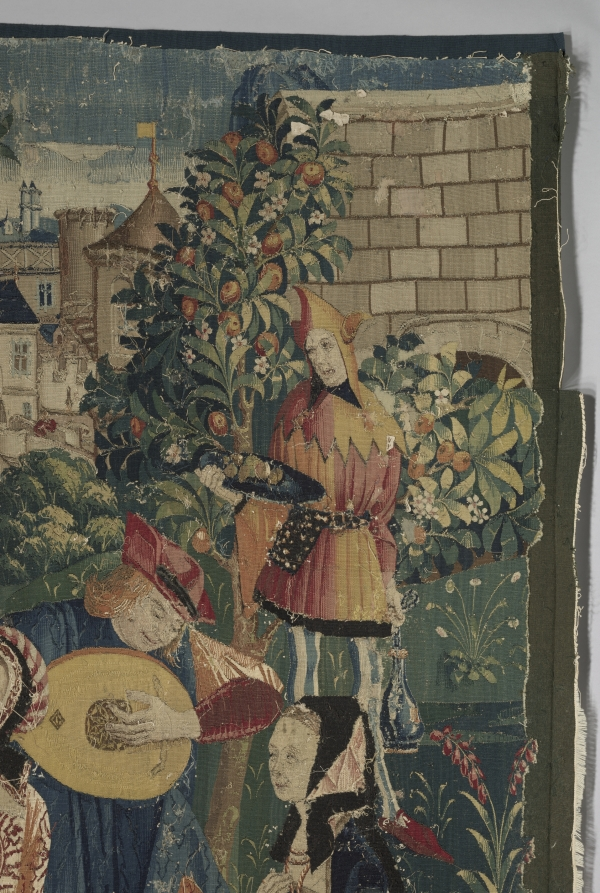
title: Time (from Chateau de Chaumont set)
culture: France, Lyon(?), early 16th century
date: 1512–15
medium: silk and wool; tapestry weave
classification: Tapestry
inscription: French verse in Gothic letters translates as follows: "One sees the weather adorned in green, Sometimes as pleasing as an angel; To suddenly change and be quite strange, The weather never stays the same."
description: Pierre Sala, who likely commissioned the set, is portrayed as the richly attired central figure offering a bouquet, a symbol of knowledge, to Éléonore, his daughter. Éléonore is pregnant, revealed by her upturned skirt and the persimmon in her husband Hector’s hand. Hector’s mother, Marguerite, in dark attire, will wed the widowed Sala in 1519. They appear in front of the royal chateau of Blois. The figures at the right convey Sala’s advice to his children. Time (the old man with the staff) with Clio, the Muse of History, standing on his shoulders, is being attacked by a Herculean youth wielding a stick. With this allegory, Sala is explaining that youth is ignorant of the complexities of life and time. The small unicorn at the far right represents the soul. The verse in Old French at the top refers to changing time: One sees Time adorned with green foliage, Sometimes as pleasant as an angel, Then suddenly change and become quite strange. Never does Time persist in one state.